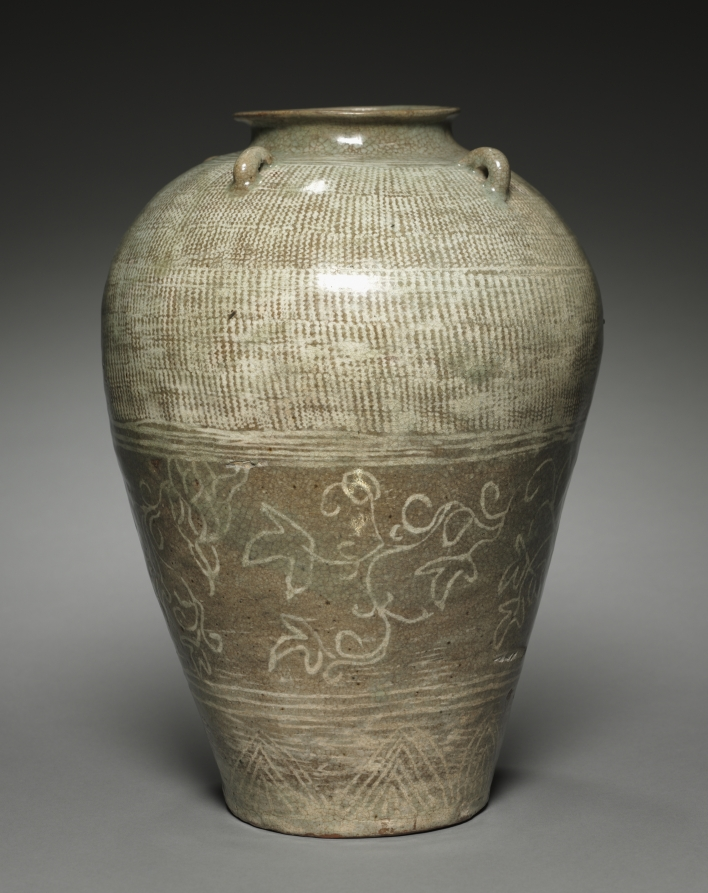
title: Jar with Scroll Design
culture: Korea, Joseon dynasty (1392–1910)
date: 1400s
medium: Buncheong ware with incised, stamped, and slip-inlaid decoration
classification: Ceramic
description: In premodern Korea, a newborn baby’s umbilical cord and placenta were believed to be a symbol of the life force of the fetus and thus kept in a specially arranged burial site. This jar was made exclusively for burying a placenta, a custom practiced by aristocratic families in Korea in the belief that it would bring happiness to the child.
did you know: The tiny ear-like handles located around the jar's shoulder allowing string to pass through were used to keep the lid (now missing) tightly closed.